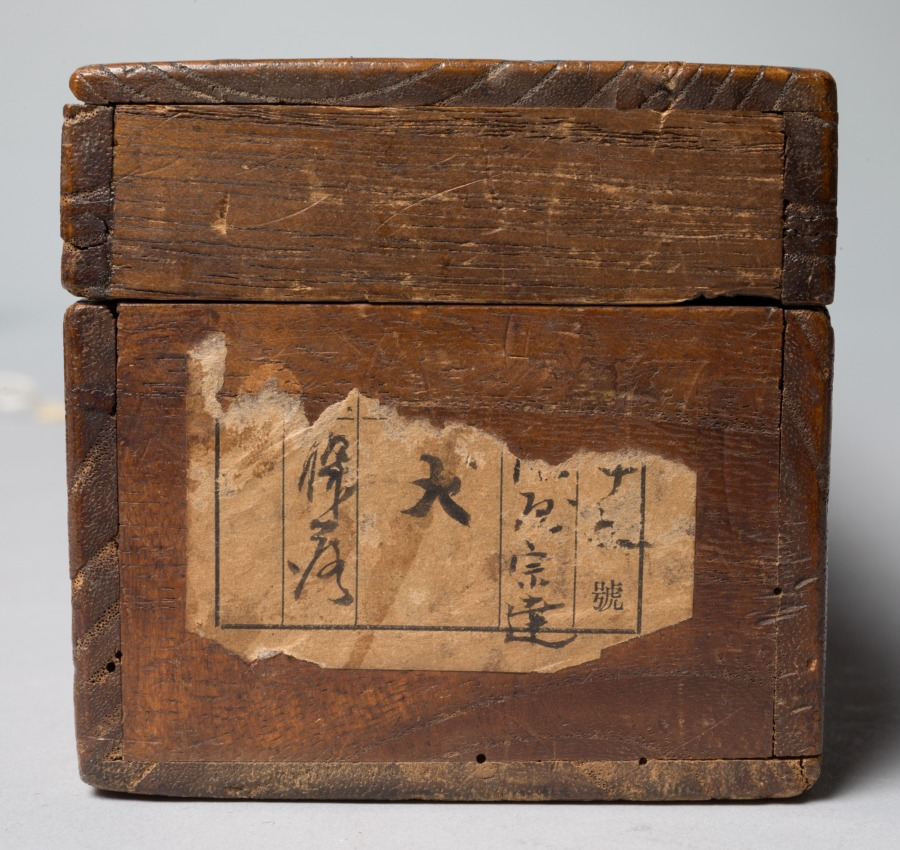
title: Puppy with Dandelions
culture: Japan, Edo period (1615–1868)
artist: studio of Tawaraya Sōtatsu (Japanese, c. 1570–c. 1640)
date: 1600–1640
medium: hanging scroll; ink on paper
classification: Painting